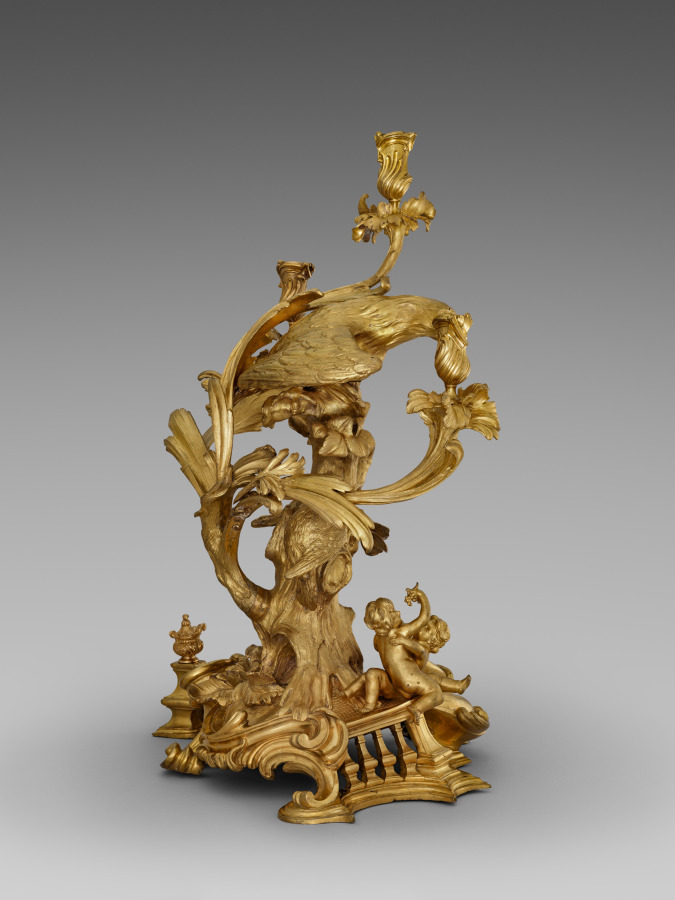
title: Candelabrum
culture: France, 18th century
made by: probably by Jean Joseph de Saint-Germain (French, 1720–1791)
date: c. 1750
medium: gilt bronze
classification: Furniture and woodwork